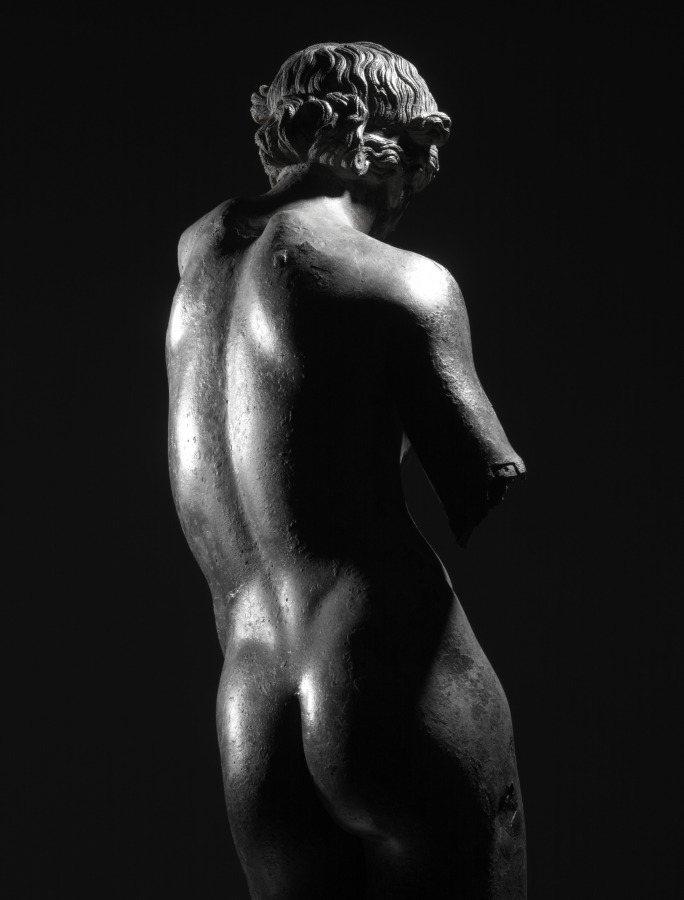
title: The Cleveland Apollo: Apollo Sauroktonos (Lizard-Slayer) or Apollo the Python-Slayer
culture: Greece, Athens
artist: attributed to Praxiteles (Greek, Athenian, c. 400–330 BCE)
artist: or Follower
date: c. 350–200 BCE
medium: bronze, copper and stone inlay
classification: Sculpture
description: The Cleveland Apollo was cast in multiple sections using the indirect lost-wax technique. First, molds were taken from a working model (now no longer known or preserved), which was then reproduced in hollow wax sections, each filled with a clay core. After details were added to the wax models, each was encased in clay. Then, the wax was heated, melted out, and replaced by molten bronze. Once cooled, the hollow bronze sections were fused together and finished, patching flaws and adding inlays and other details. Since the initial model was retained, it could be reused, allowing ancient sculptors to create multiples and variations of favorite works. Thus, remarkably, the Cleveland Apollo may once have been one of several such works. The consistently thin walls of the Cleveland Apollo (mostly 5-6 mm thick), together with the nearly invisible joins between most cast sections, show that it was created by highly skilled sculptors and foundry workers. Close looking reveals several noteworthy features. First, ovals atop the right foot mark a fusion weld, where molten bronze pooled to join separately cast sections. Second, small rectangular bronze patches cover parts of the surface (especially the right hip), each carefully cut and then hammered into place over holes or other casting defects. Inlaid lips, nipples, and eyes (the right ancient stone, the left now a modern replacement) added to the lifelike appearance of the sculpture, contrasting with the once bronze-colored skin. Finally, radiography helps to illuminate hidden features, such as the cast edge of the neck of Apollo.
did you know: Ovals across the top of the right foot show a clear join between separately cast sections.